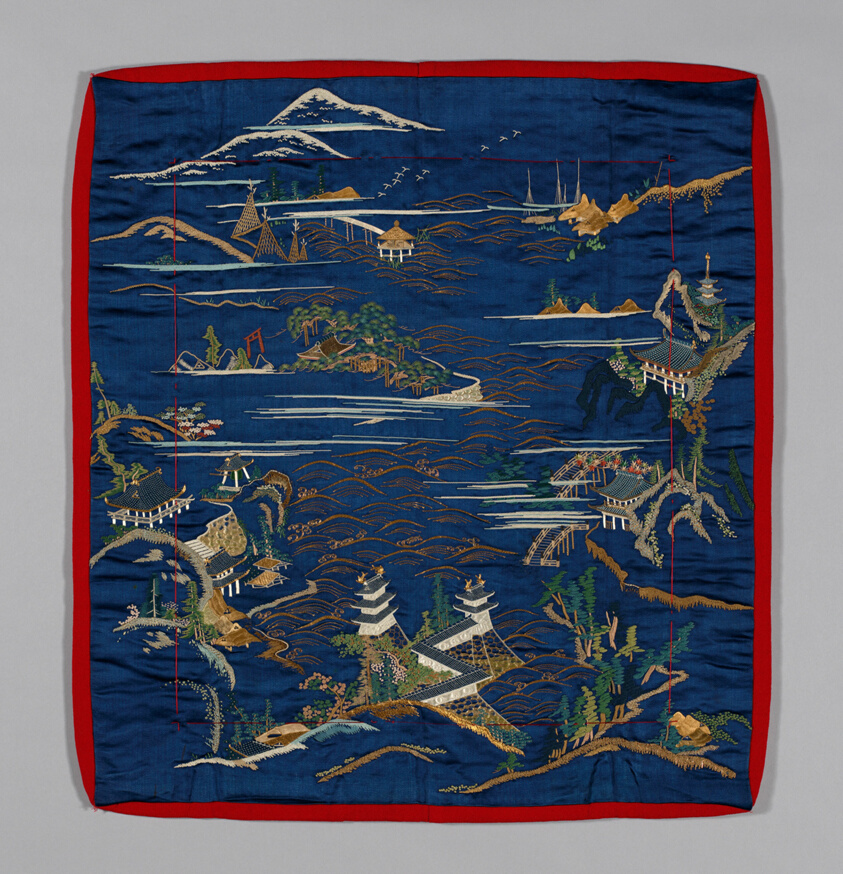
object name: Textile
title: Fukusa (Gift Cover)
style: late edo, edo (japanese period), Japanism, East Asian, asian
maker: Japan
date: late Edo period (1789–1868), early 19th century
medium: Patterned side: silk, warp-float faced 4:1 satin weave (shusu); embroidered with silk and gold-leaf-over-lacquered-paper-strip wrapped silk in Chinese knot, satin, single satin, surface satin, stem and straight stitches; paper-strip wrapped cotton padded satin stitches; laidwork and couching; painted India ink (sumi) details Lined (re-lined) with silk, plain weave with creped wefts (chirimen); interlined with cotton; plain weave; padded with waste silk Sewn with padded lining extending beyond front at center on all four side (Yatsuzuma); silk, running "controlling" stitches along edges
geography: Japan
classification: textile; needlework (visual works); weaving